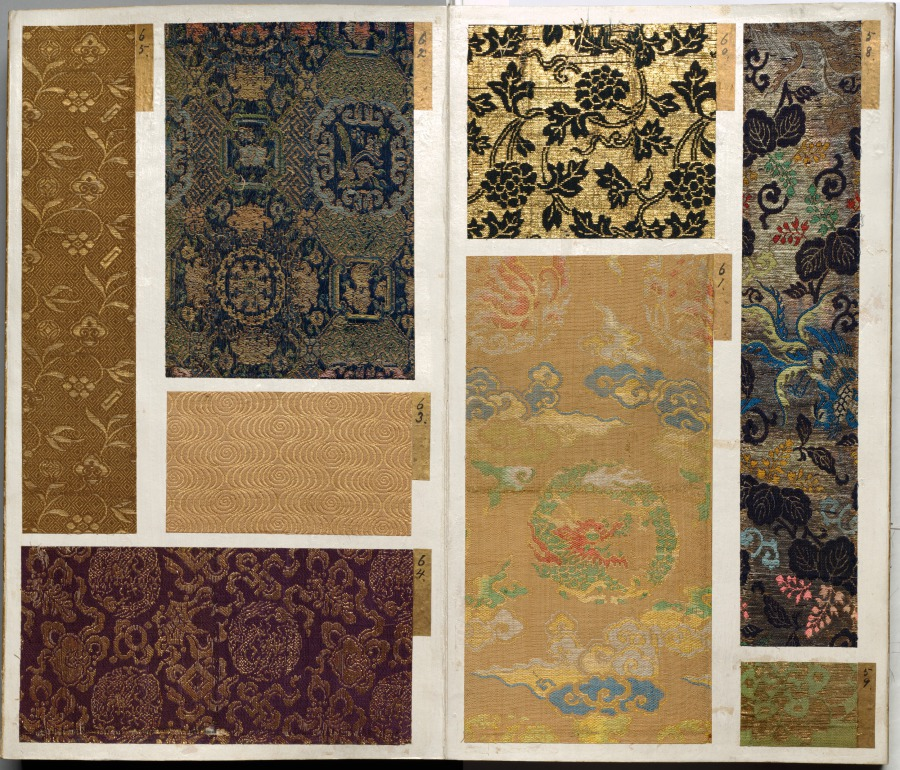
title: Album of Textile Samples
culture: Japan, Edo period (1615–1868)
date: 1600s-1700s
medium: silk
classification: Textile